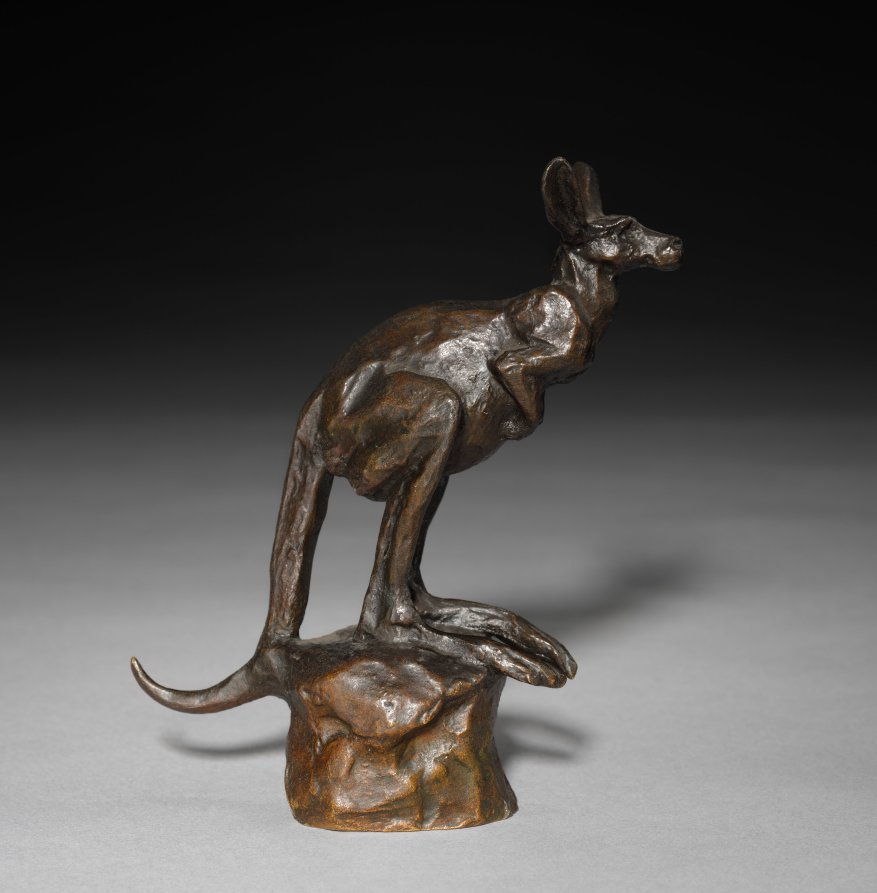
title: Kangaroo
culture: France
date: c. 1900–1925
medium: bronze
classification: Sculpture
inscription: Signed Nottot (?); ANDRO. FONDEUR, lower base